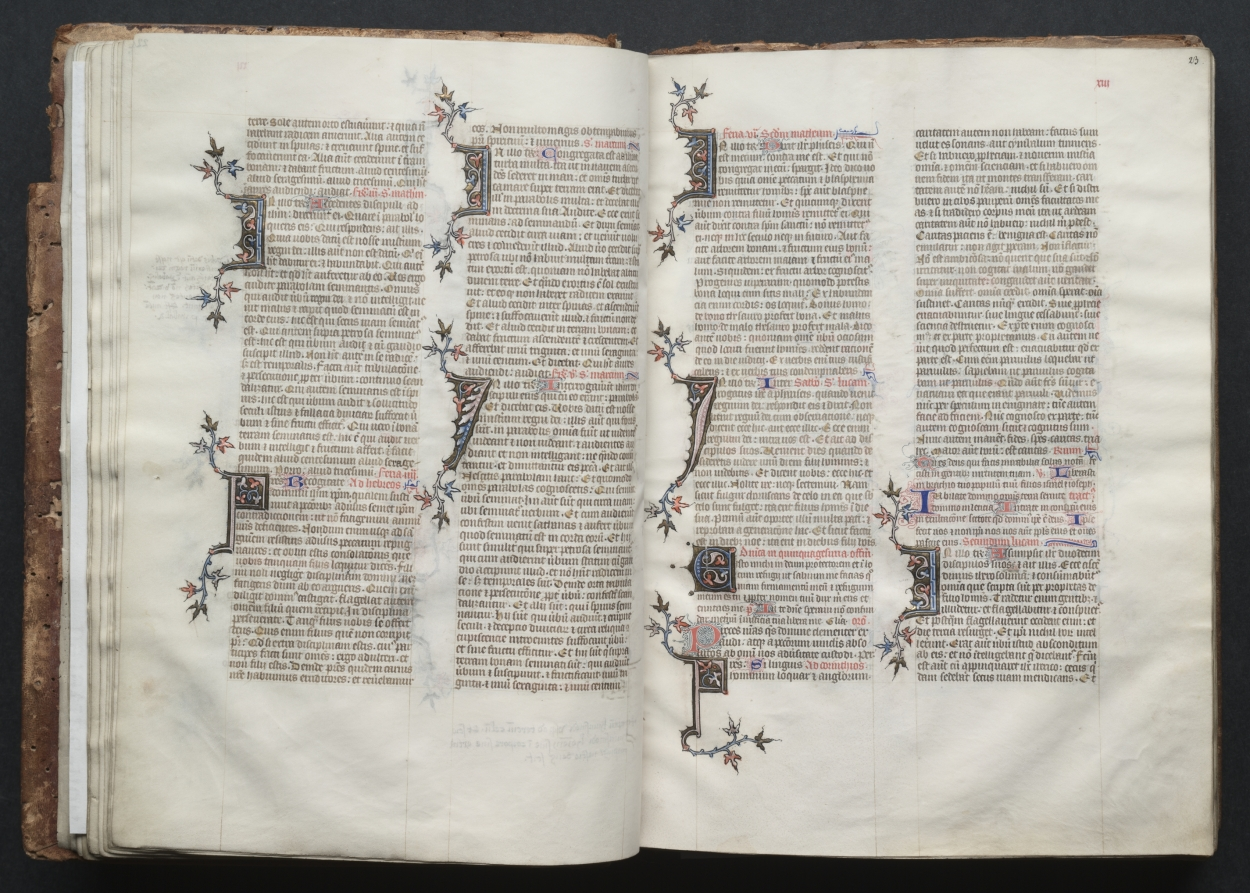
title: The Gotha Missal: Fol. 23r, Text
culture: France, Paris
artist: Master of the Boqueteaux (French)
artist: and Workshop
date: c. 1375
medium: ink, tempera, and gold on vellum; blind-tooled leather binding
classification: Bound Volume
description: The style and quality of this manuscript's decoration is typical of deluxe Parisian books made for aristocratic or royal patrons. Most of the book's decoration appears to be the work of the Master of the Boqueteaux, an artist active at the court of King Charles V (died 1380). His style was apparently shared by a number of book illuminators working in and around Paris. It is very possible that the Gotha Missal belonged to Charles V, but is not provable because the manuscript has no royal portraits and lacks a colophon. Given the book's magnificent decoration, however, it would seem that it was produced for a Valois prince, if not for the king himself. The manuscript receives its name from the German dukes of Gotha, its later owners.